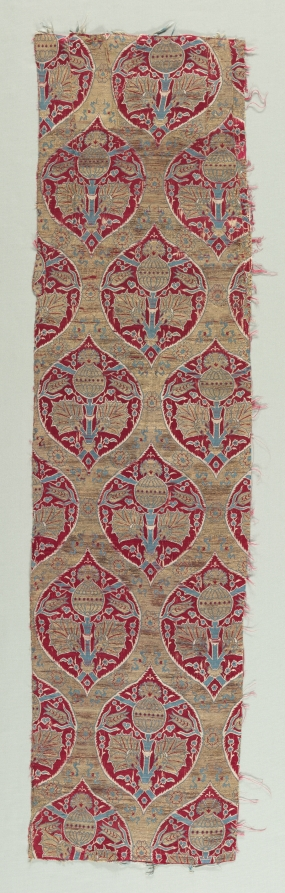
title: Ogival Lattice with Horizontal Design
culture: Turkey, Bursa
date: 1600–1650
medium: Silk and gilt-metal thread: lampas weave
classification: Textile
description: There is a pomegranate design in each ogee (pointed arch) of this silk brocade fragment. The pomegranate is a small tree originating in Persia (today’s Iran) bearing fruit of deep red flesh filled with hundreds of seeds. The pomegranate has been revered as a symbol for health and fertility by many civilizations. In Islam the pomegranate is associated with paradise as described in the Qur’an.